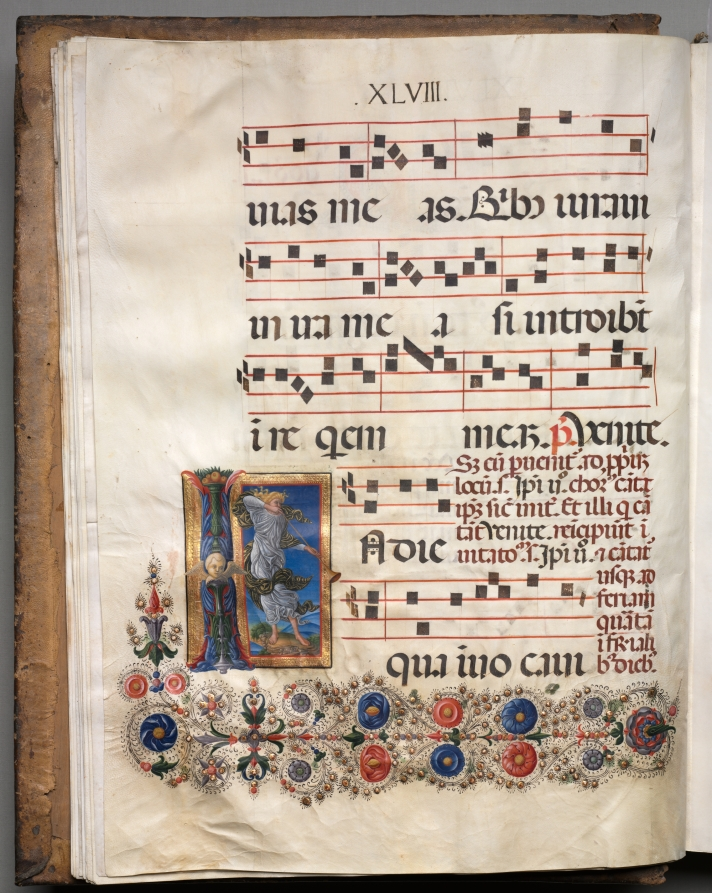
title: Antiphonary: Initial, angel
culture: Italy, Siena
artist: follower of Girolamo da Cremona (Italian)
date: c. 1470–80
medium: ink, tempera, and gold on parchment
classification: Manuscript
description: The initial A with the resurrected Christ, shown here, was painted by an immediate follower of Girolamo da Cremona, who was likely working in Siena using the master's designs. Girolamo was intermittently active until 1474 in Siena, where he decorated choir books for the cathedral in collaboration with other North Italian illuminators. Antiphonaries like this one were usually made in several volumes for use by a clerical congregation. They were applied to the singing of the Daily Office, the cycle of daily devotions throughout the year. The chant introduced by this initial reads: Angelus Domini descendit de celo... (An angel of the Lord descended...). It is the First Matins Response for Easter.